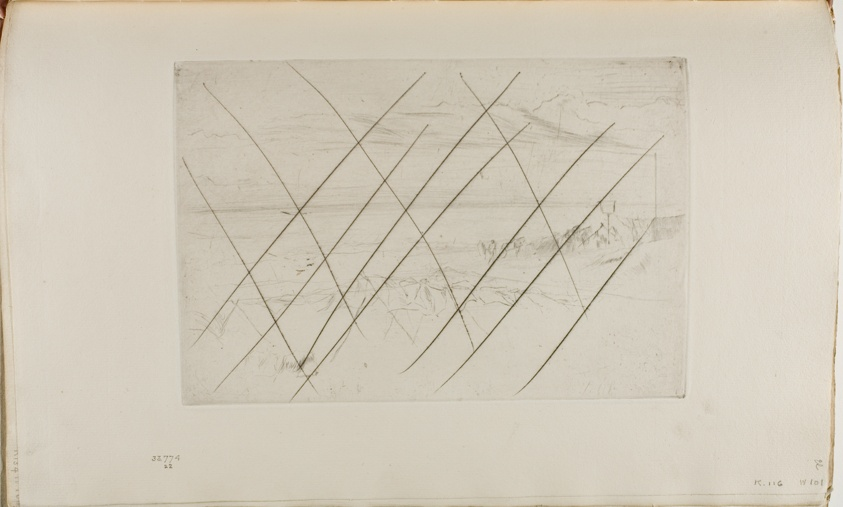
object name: Print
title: The Beach, Hastings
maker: James McNeill Whistler (American, 1834-1903)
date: 1875/78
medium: Drypoint with foul biting, with drypoint cancellation, in black ink on ivory laid paper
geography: United States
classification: drypoint; prints and drawing; book; foul biting; print; paper